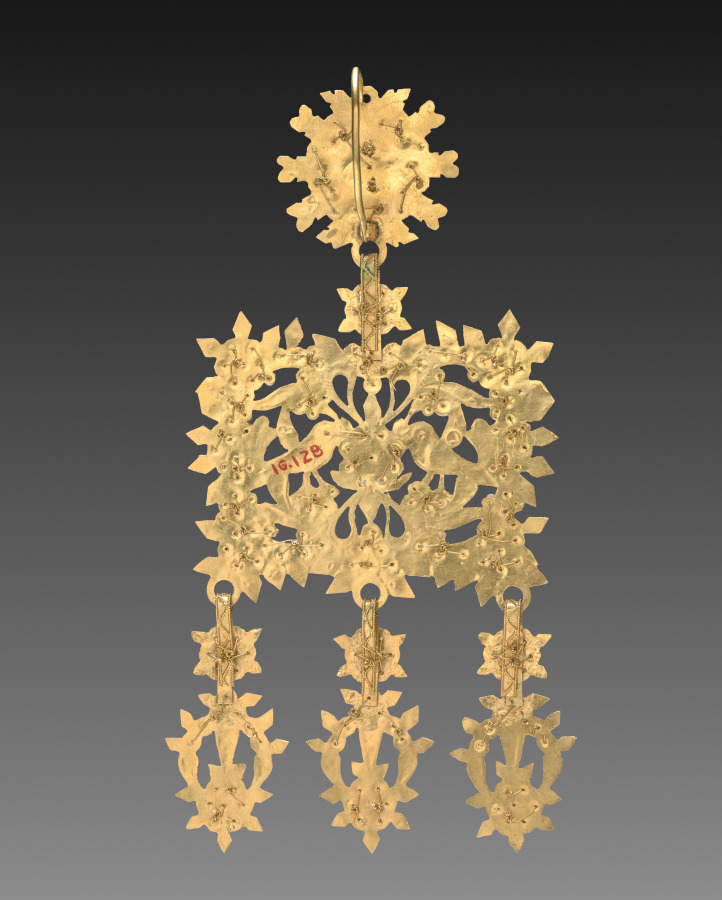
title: Earring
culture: Italy, Sardinia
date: 1700s - 1800s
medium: gold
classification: Jewelry